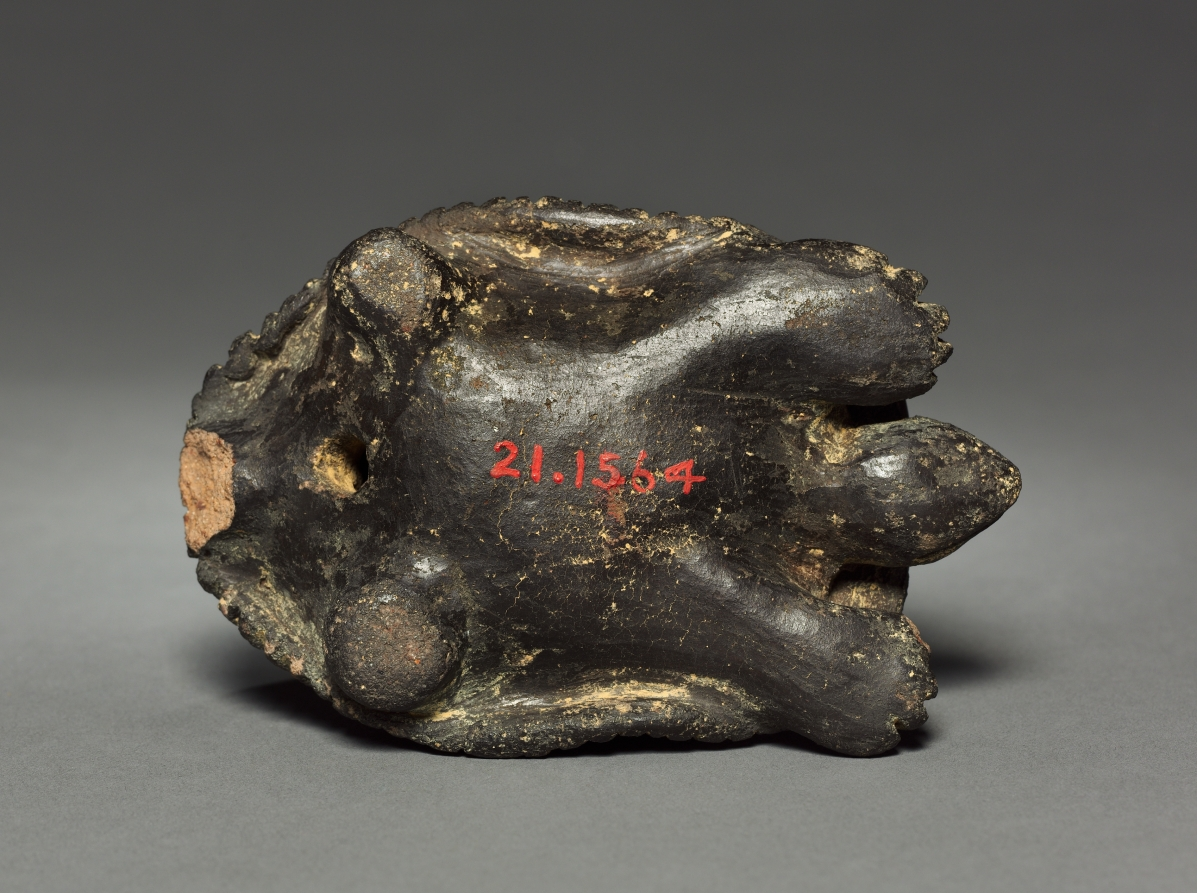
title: Turtle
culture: Colombia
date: before 1921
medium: pottery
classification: Ceramic